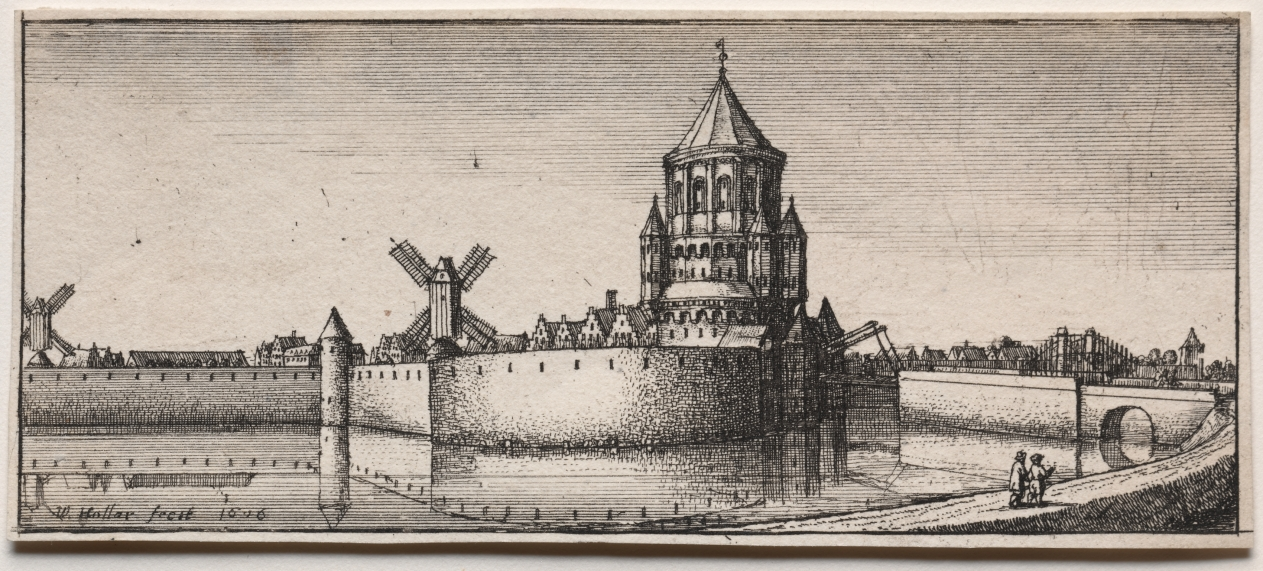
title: Moated Town Gate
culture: Bohemia, 17th century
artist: Wenceslaus Hollar (Bohemian, 1607–1677)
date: 1676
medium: etching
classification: Print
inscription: inscribed, lower left, in plate: W. Hollar fecit 1676